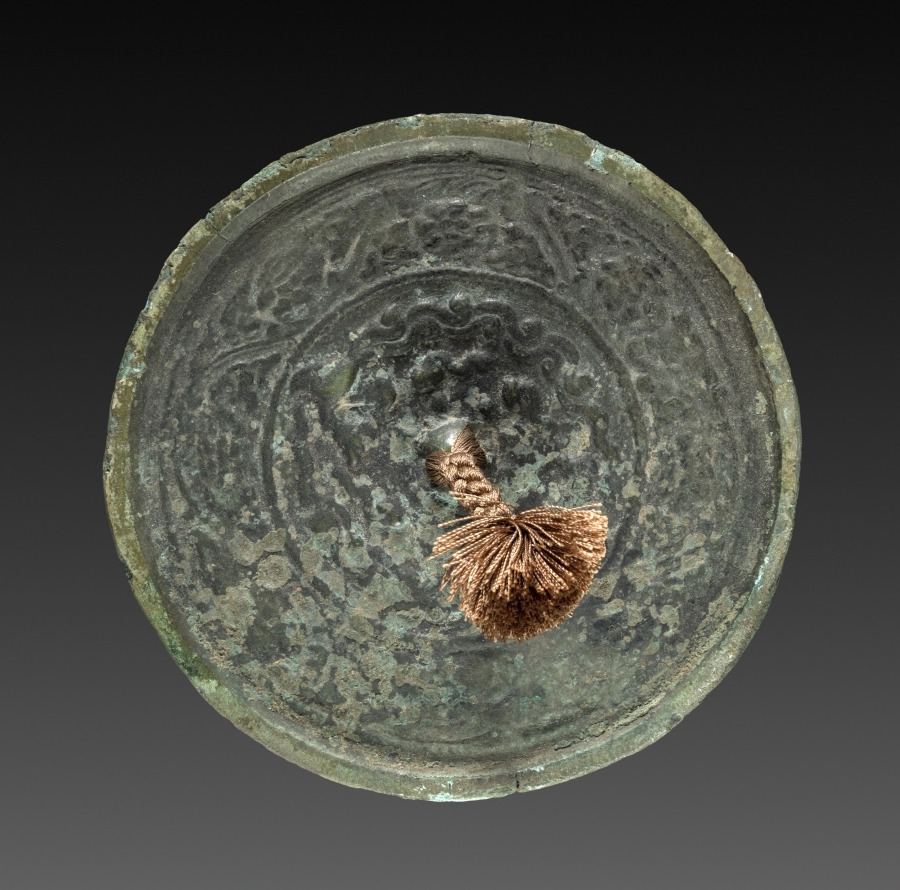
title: Mirror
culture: Japan, Heian period (794–1185)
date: 794–1185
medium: bronze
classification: Metalwork